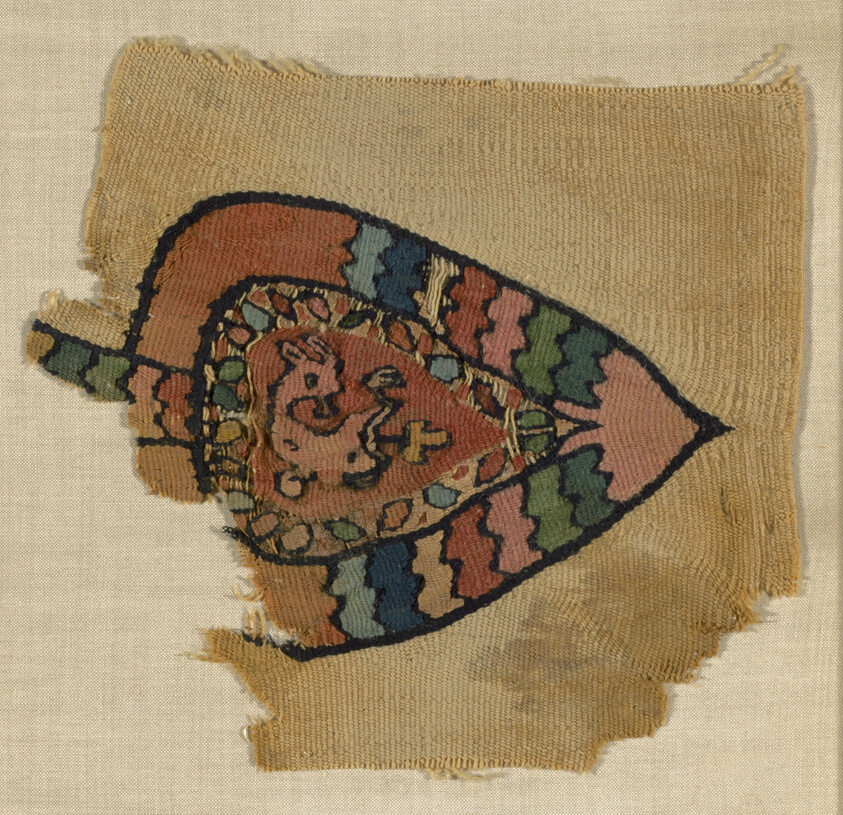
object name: Textile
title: Fragment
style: roman period (egyptian)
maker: Coptic (Egypt)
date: Roman period (30 B.C.– 641 A.D.)/Arab period (641–969), 7th century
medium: Linen and wool, tapestry weave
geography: Egypt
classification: textile; weaving